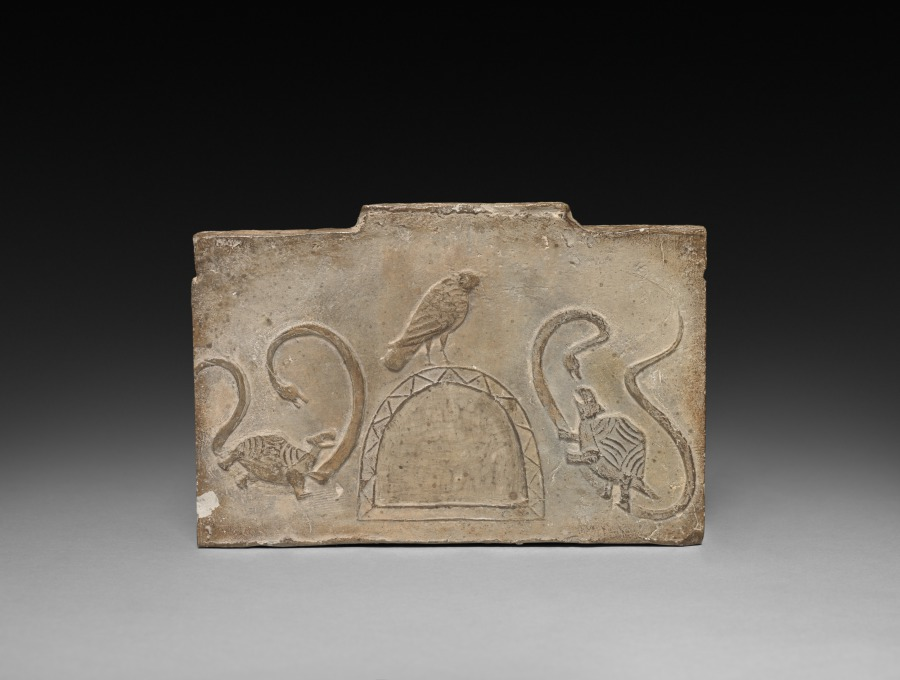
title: Panel from Model Cooking Stove: Raven Flanked by Snake-Entwined Tortoises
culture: China, from a tomb in Xi'an, Shaanxi province, Western Han dynasty (206 BCE–8 CE)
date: 100–1 BCE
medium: earthenware with impressed relief decoration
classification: Ceramic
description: Han dynasty tombs were often furnished with grave goods to provide the deceased with items for the afterlife. Four earthenware panels were made in molds and then joined together to make a miniature model of a stove, which was placed in a burial chamber. The four sides show the animals of the cardinal directions. Two snake-entwined turtles designate the north, and here flank an archway that simulates the opening for fueling the stove. Above the arch perches a raven, which is identified with the sun, perhaps depicted here to denote the heat issuing from the false opening.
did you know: Han dynasty tombs were often furnished with grave goods to provide the deceased with items for the afterlife.